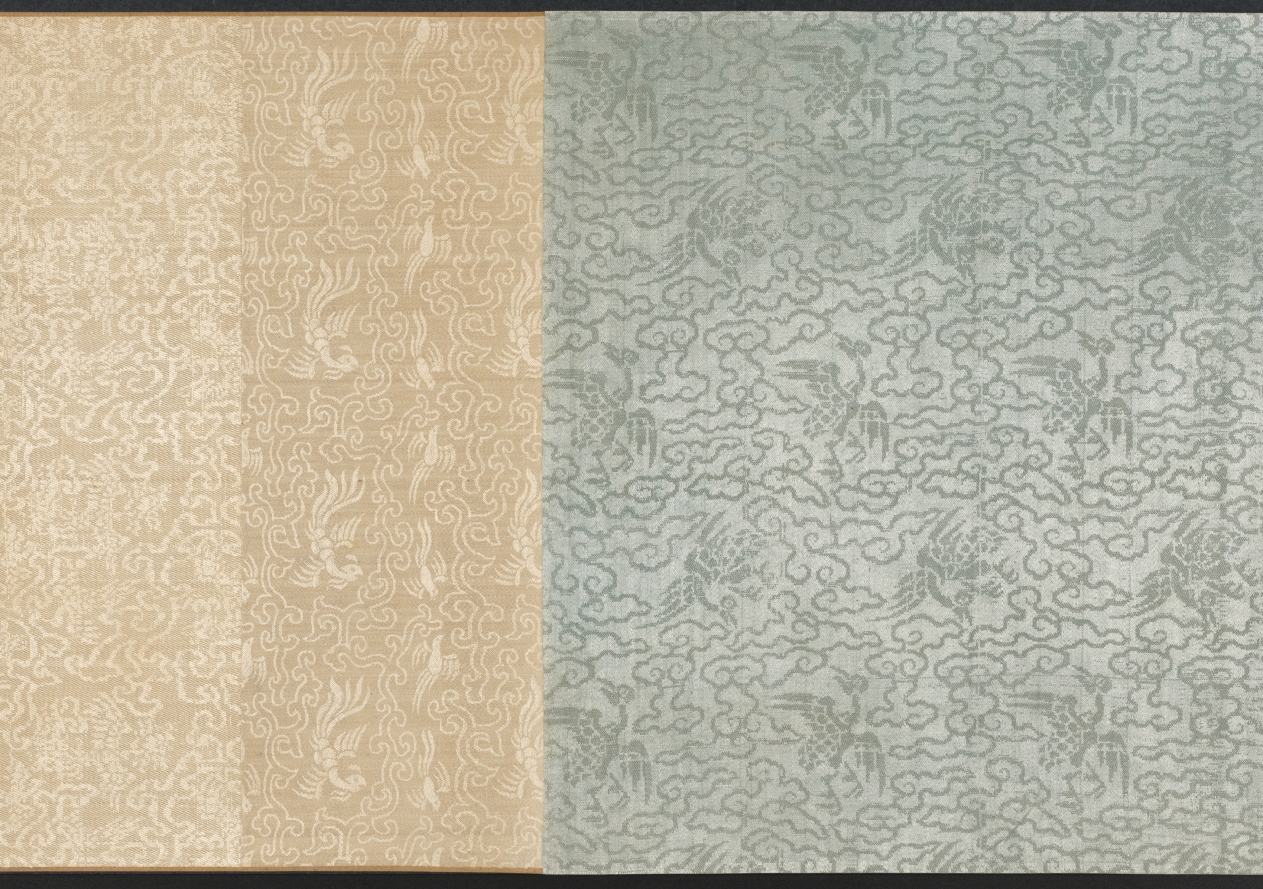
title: The Nine Elders of the Mountain of Fragrance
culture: China, Ming dynasty (1368–1644)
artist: attributed to Xie Huan (Chinese, c. 1370-c.1450)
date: 1426–52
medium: handscroll, ink and color on silk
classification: Painting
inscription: 4 seals: 2 of Xiang Yuanbian 項元汴 (1525–1590); 1 of the Qianlong Emperor (r. 1736-95); 1 of C. C. Wang 王季遷 (1907–2003)